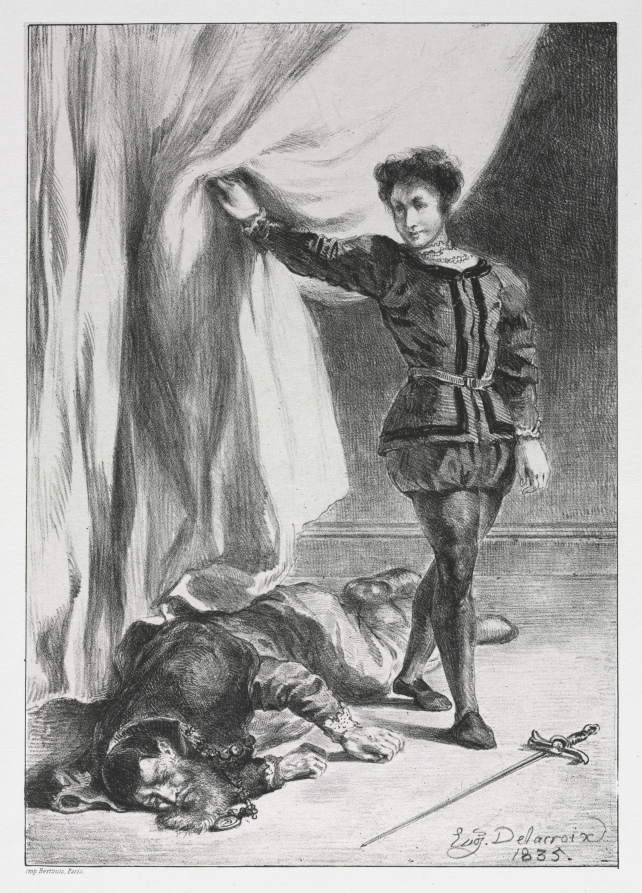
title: Hamlet: Hamlet and the Corpse of Polonius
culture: France, 19th century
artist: Eugène Delacroix (French, 1798–1863)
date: 1835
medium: lithograph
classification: Print